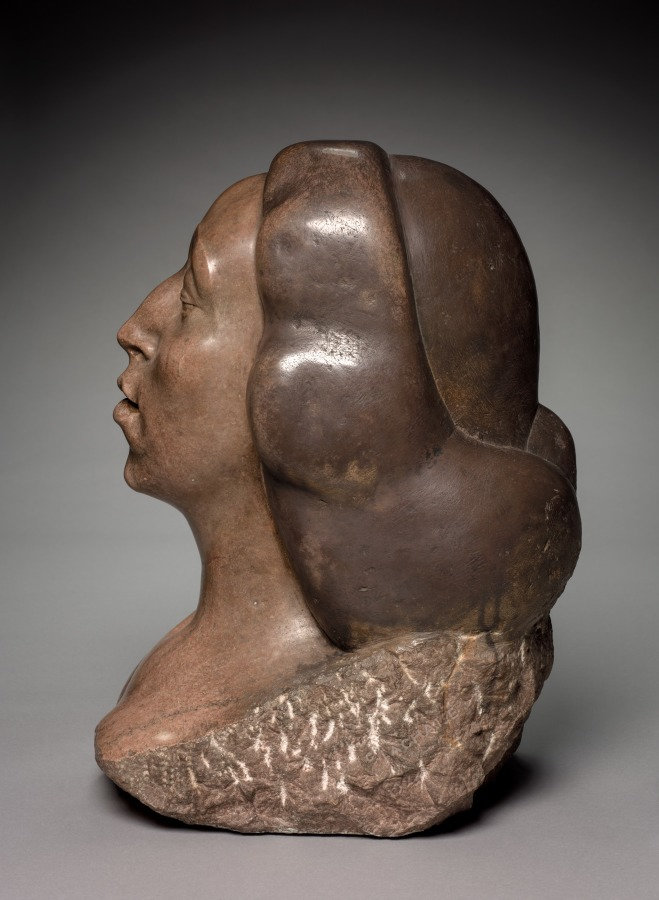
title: Head of Woman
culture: America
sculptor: Gaston Lachaise (American, born France, 1882–1935)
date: 1920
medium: pink Tennessee marble and black pigment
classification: Sculpture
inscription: Signed on base: G. LACHAISE 1923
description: Gaston Lachaise acknowledged that his wife, Isabel Dutaud Nagel Lachaise, was "the primary inspiration which awakened my vision and the leading influence that has directed my forces." Head of a Woman is one of several sculpted portraits he made of her.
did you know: Born in Paris, France, Gaston Lachaise immigrated to the United States in 1906.